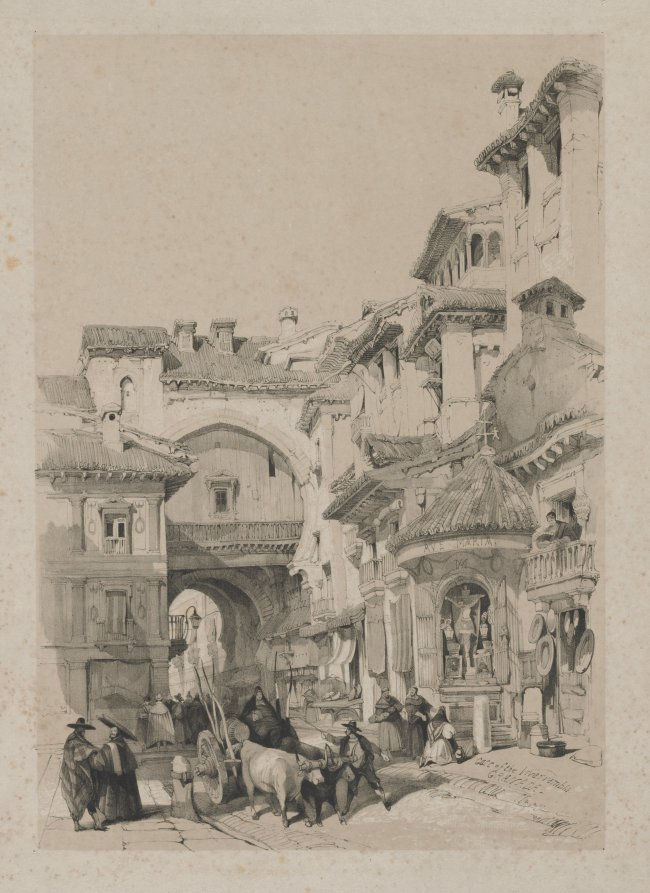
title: Picturesque Sketches in Spain: Gate of the Vivarrambla, Granada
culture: England, 19th century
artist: Thomas Shotter Boys (British, 1803–1874)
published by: Hodgson & Graves6, Pall Mall, London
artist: after David Roberts (Scottish, 1796–1864)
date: 1837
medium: lithograph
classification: Print